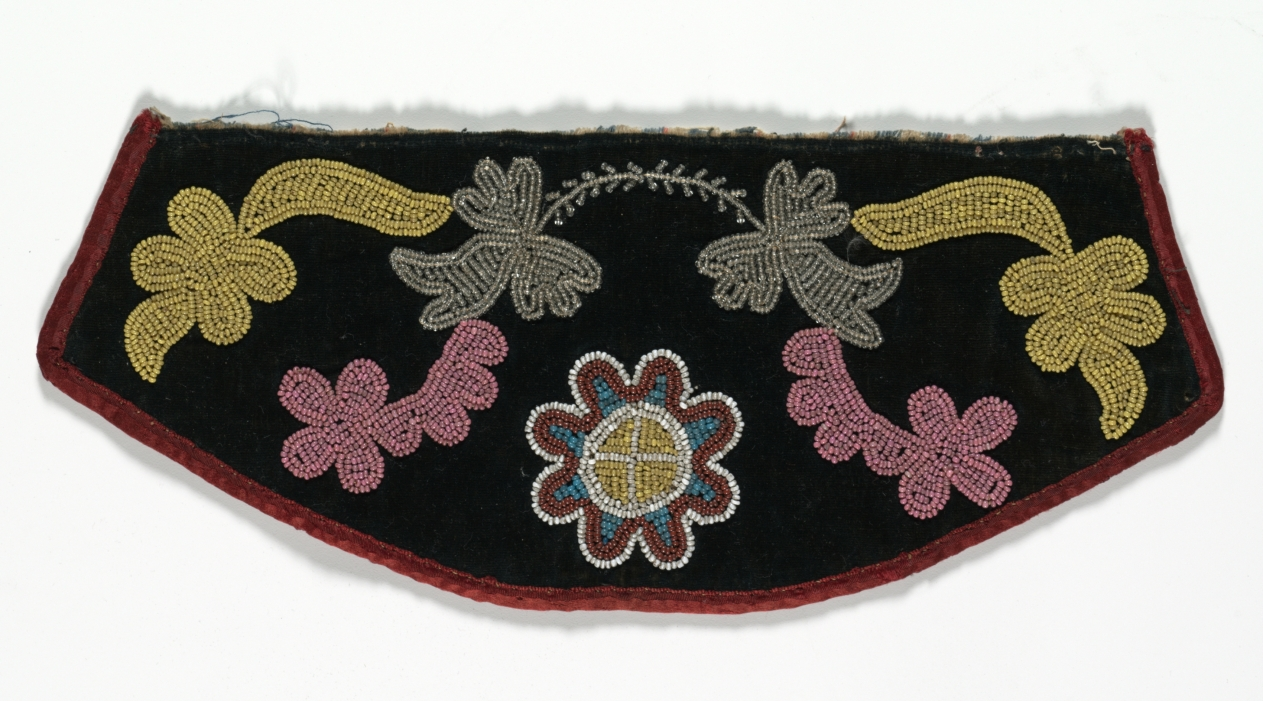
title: Cuff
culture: Northeast Woodlands, Great Lakes Region, Anishinaabe (Ojibwe) or Nehiyawak (Cree) People?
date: late 1800s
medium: Velvet, satin, glass beads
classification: Garment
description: In the 1800s, native peoples began to use European fabrics to fashion fine formal garments; they favored sturdy cloth, such as velvet and wool broadcloth, which provided support for heavy decorative beadwork that was added by hand. Often the fabric was a dark color, providing dramatic contrast for the multicolored beads. Rather than encrusting the entire garment, beadwork was confined to cuffs, “epaulettes,” bib-like plackets and yokes, rectangular panels sewn to leggings, shirts, and dresses, and the like.